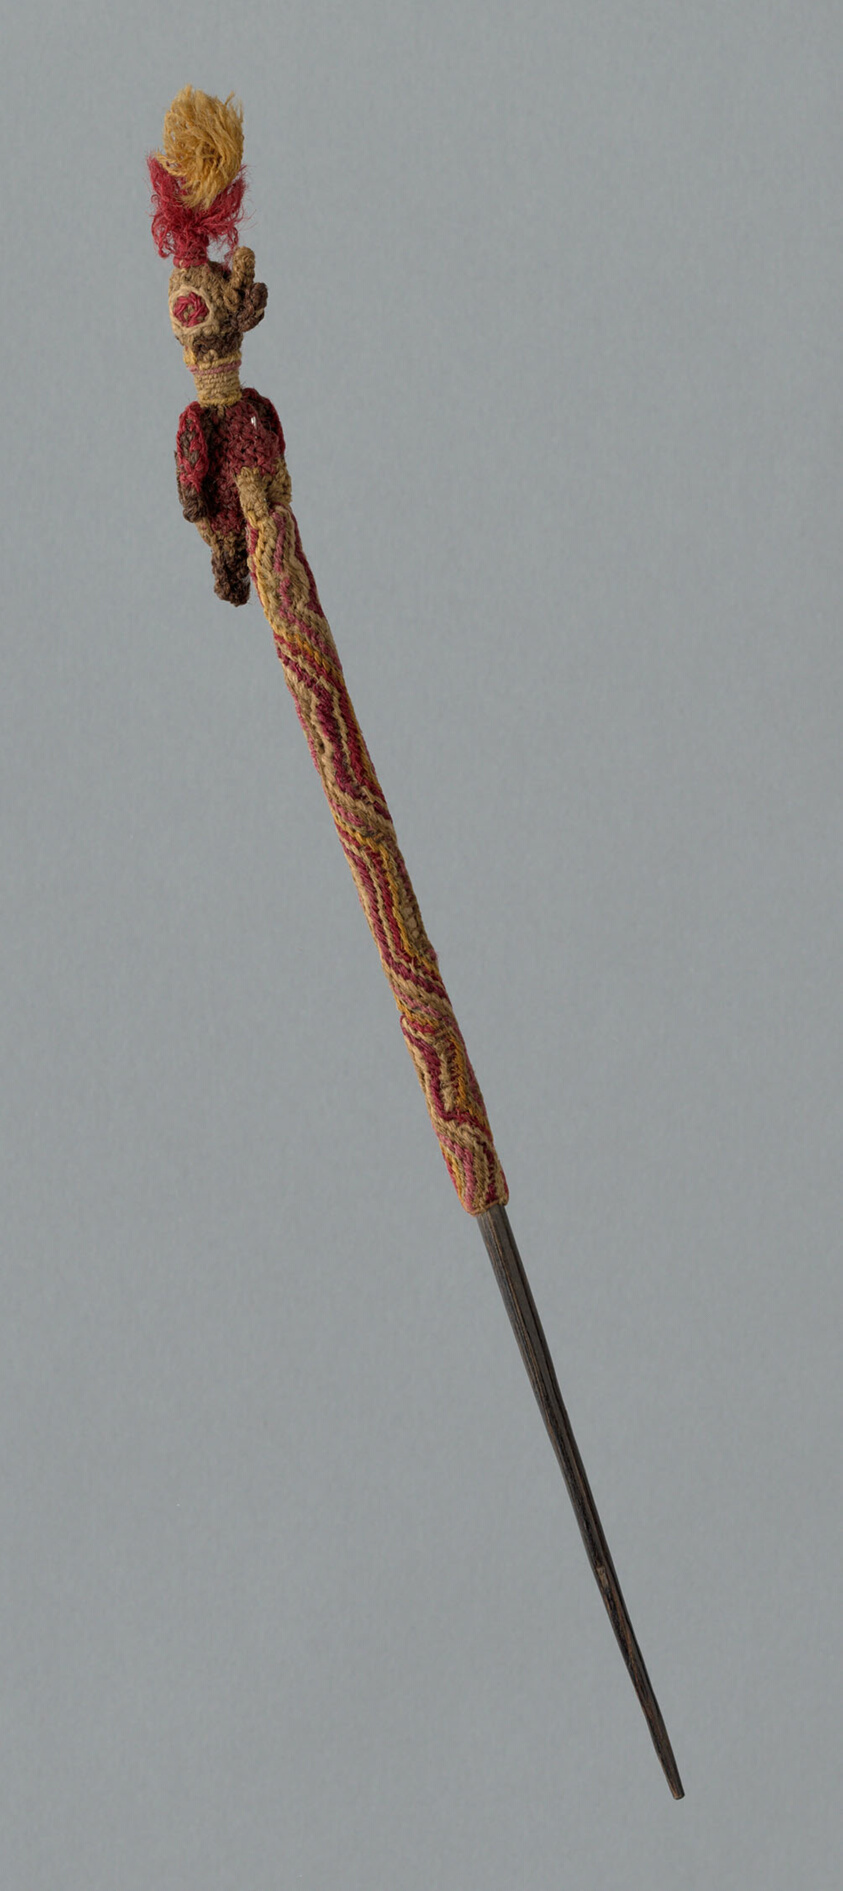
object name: non-art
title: Wooden Spindle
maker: Peru, Possibly central coast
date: 1000/1476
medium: Wood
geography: Peru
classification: spindles (textile working equipment); textile working equipment; accessories (object genre); textile